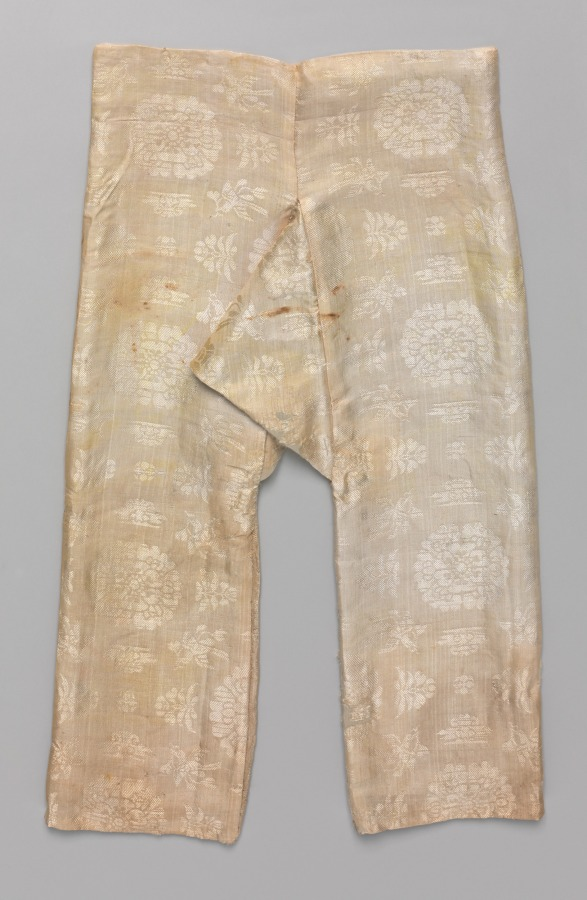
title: Prince's trousers and lining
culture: China, Tang dynasty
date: 700s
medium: twill damask: silk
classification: Garment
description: This coat and pants are part of a set of garments that originally included an outer pair of pants and silk boots made from the same material as the coat. Such rich garments would have been worn by a member of the imperial family or nobility. The fabrics comprising this outfit were woven in widely distant parts of Asia. The silk of the coat, with ducks in pearl roundels, was woven in Sogdiana. The white silk of the pants, ornamented with flowers and birds, is Chinese. Both garments are lined with a Chinese silk woven with a radial floral pattern that was common during the 700s. The coat and pants were made at a time when Tibetan power extended to parts of China, eastern Central Asia, and the trade routes to Sogdiana.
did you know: The pants are made of three parts: two rectangles folded down their length and joined by an inseam, a center front seam, and a back seam; a third piece is a square folded to form a triangle and inserted into the inseam at the crotch